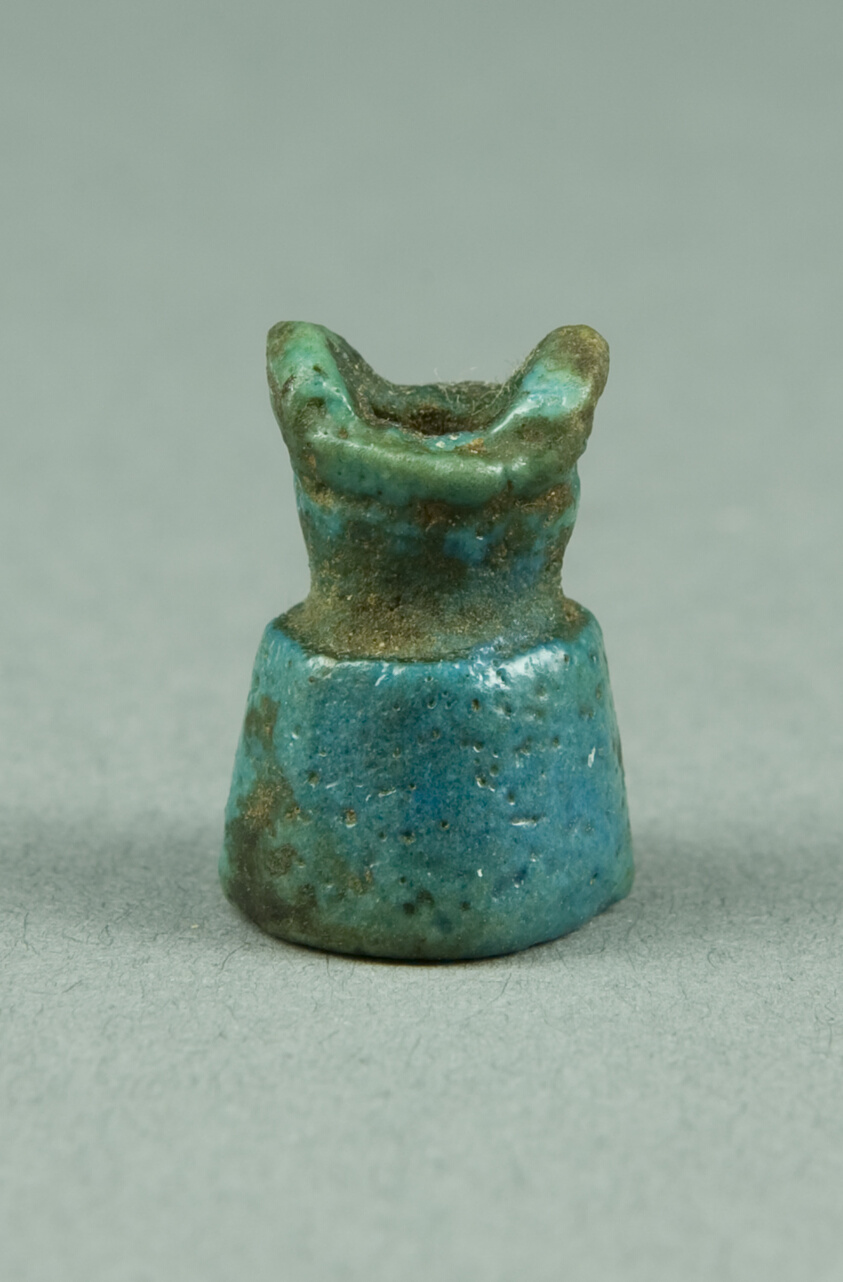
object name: Costume and Accessories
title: Amulet of a Situla (Jar)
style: egyptian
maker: Egyptian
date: Third Intermediate Period (about 1070–664 BCE)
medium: Faience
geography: Egypt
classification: amulet; jewelry; ceramics; ancient art; costume; faïence (composite material)